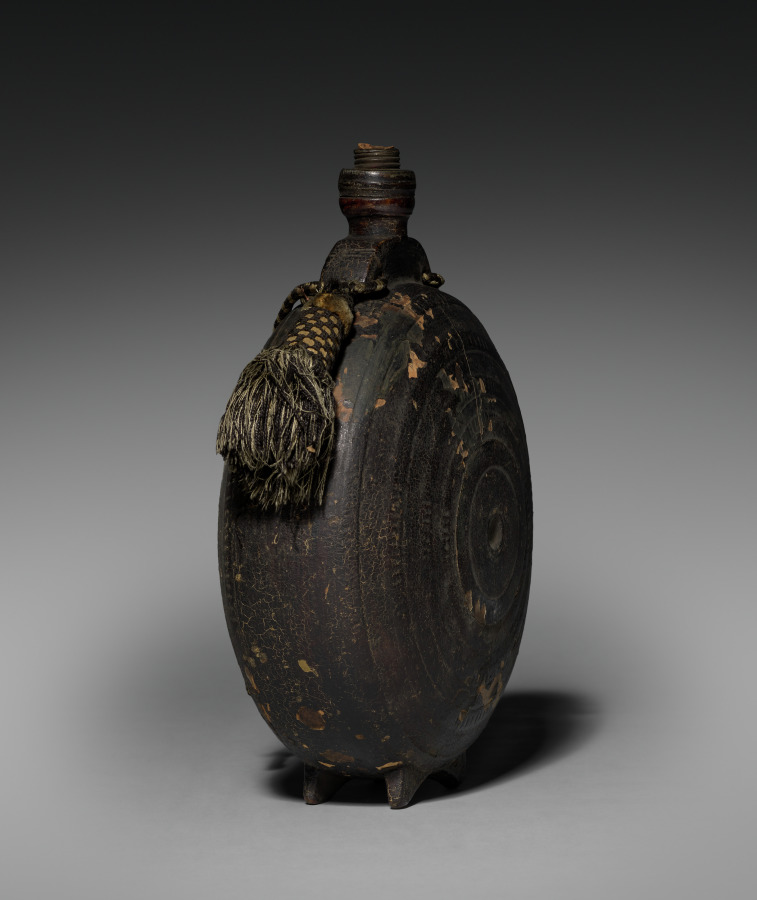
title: Powder Canister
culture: Italy, 18th century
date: 1700s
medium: wood painted black, lead charger, pewter mount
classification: Arms and Armor